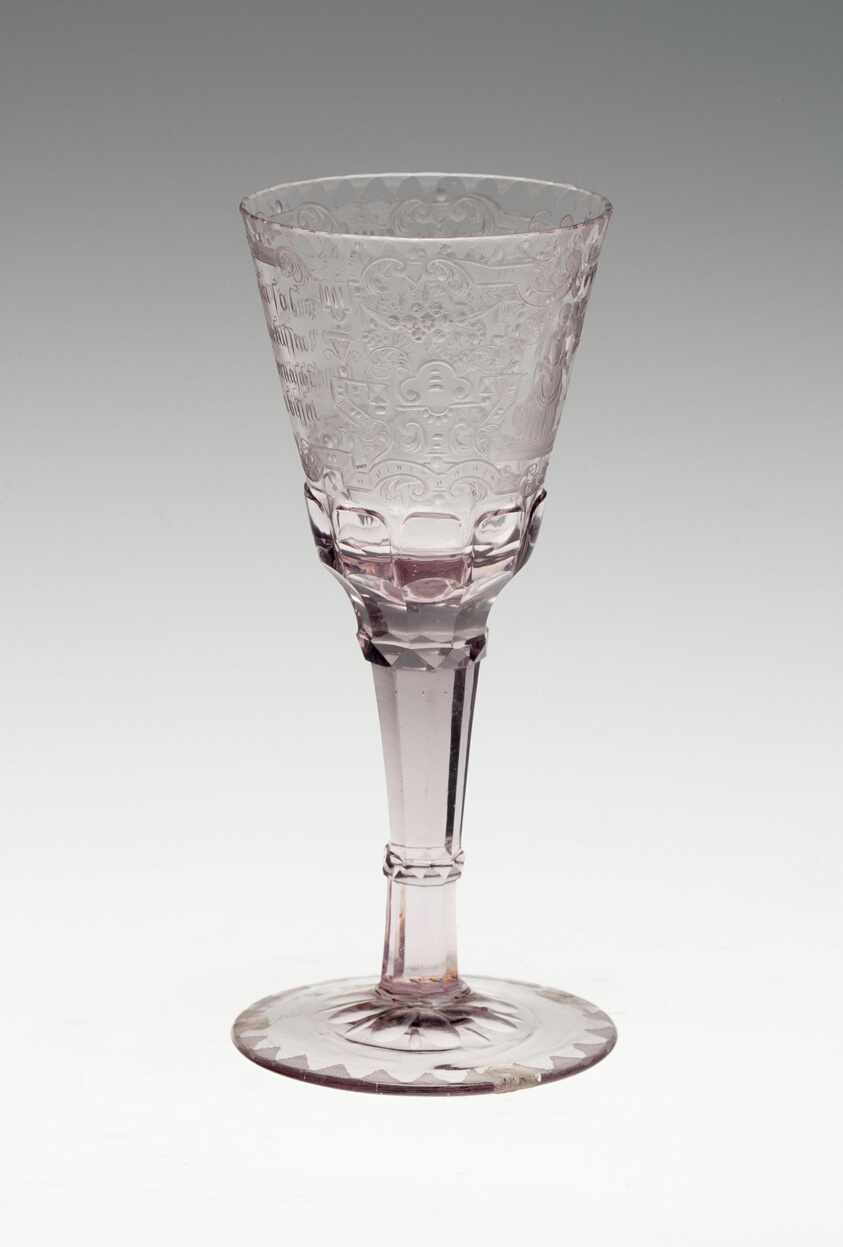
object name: Glass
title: Goblet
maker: Schleswig, Germany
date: c. 1730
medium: Glass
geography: Schleswig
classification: drinking vessel; glass; european decorative arts